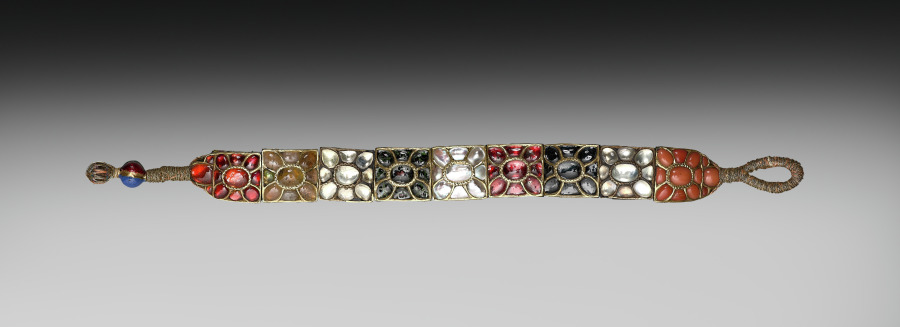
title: Armlet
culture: India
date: 1800s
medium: silver gilt with semiprecious stones and enamel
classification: Jewelry